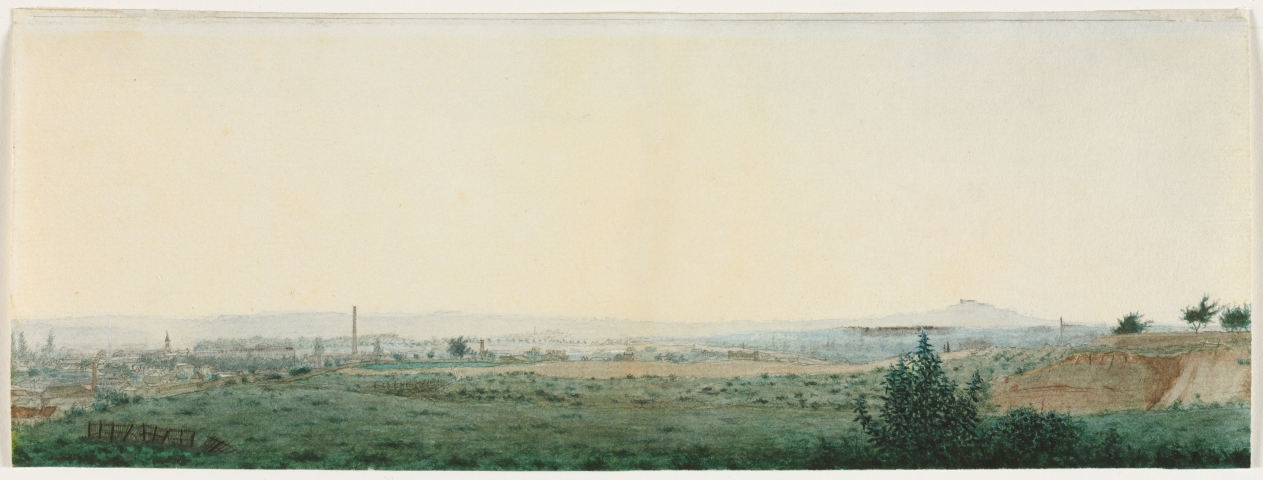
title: Landscape Near Paris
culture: France, 19th century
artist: Léon Bonvin (French, 1834–1866)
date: c. 1860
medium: watercolor, gouache, and graphite on cream laid paper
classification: Drawing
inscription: VERSO, center, in black ink: 35.49. [upsidedown] ; ON A SEPERATELY APPLIED PIECE OF PAPER (now removed and in departmental file), inscribed in brown ink: 158. Vue panoramiq[cropped] / environs de Paris - aquarelle / Léon Bonvin.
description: In his delicate studies of flowers and fields, like this panoramic view of the distant Paris, Bonvin captured the beauty of nature, observed with an innocent, untrained eye. His untutored responses to nature permitted him to be more experimental than his contemporaries working in watercolor. A realist in his rendering of natural detail, Bonvin simultaneously foreshadowed Impressionism with his interest in light and atmosphere.